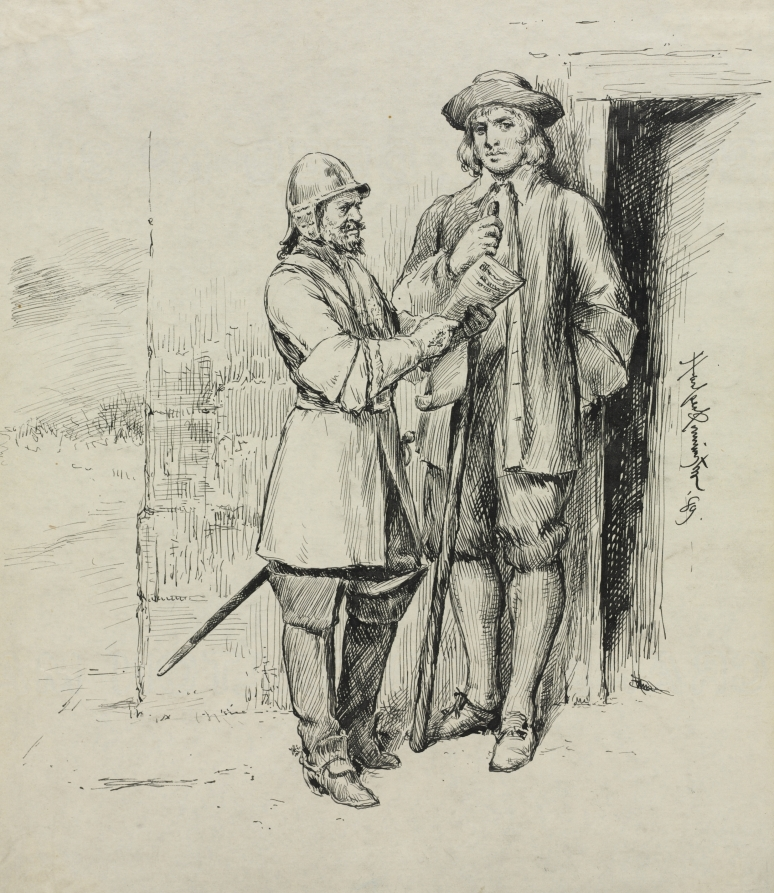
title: Illustration for Chapter XXIII from "Lorna Doone"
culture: America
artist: William Henry Drake (American, 1856–1926)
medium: pen and ink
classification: Drawing